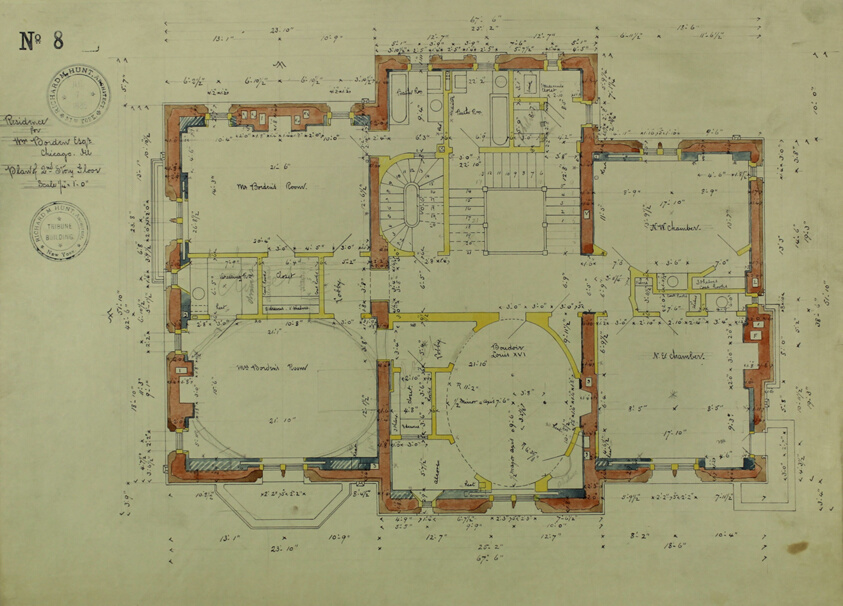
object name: Architectural Drawing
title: William Borden Residence, Chicago, Illinois, Second Story Plan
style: 19th century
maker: Richard Morris Hunt (American, 1828–1895)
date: 1885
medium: Watercolor on hectographic prints mounted on linen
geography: Chicago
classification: plan; architectural drawing; architecture; watercolor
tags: houses, architecture, illinois, Chicago, plan